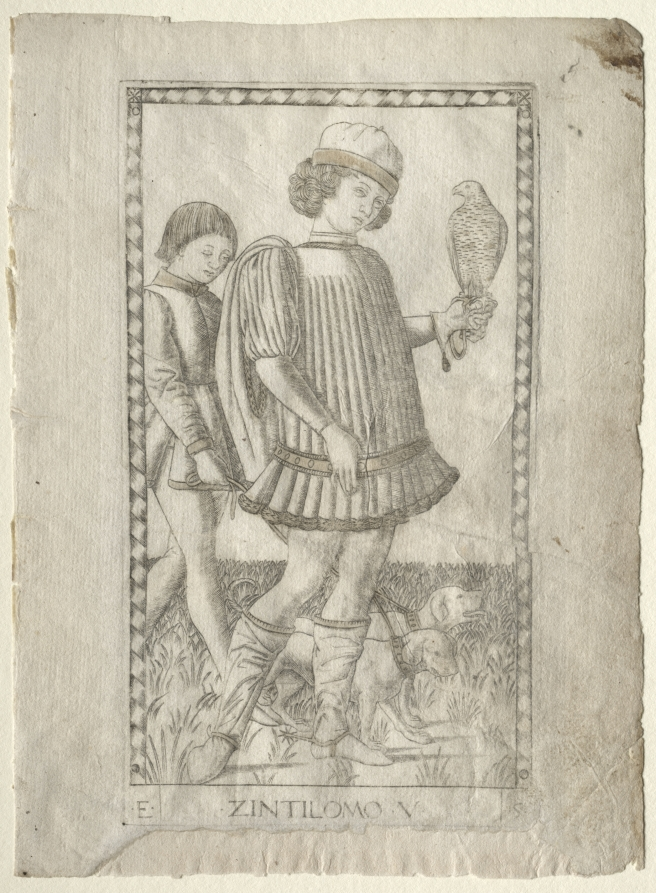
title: Gentleman (from the Tarocchi series E: Conditions of Man, #5)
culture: Italy, Ferrara, 15th century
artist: Master of the E-Series Tarocchi (Italian, active 1460s)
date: c. 1465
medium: engraving, hand-colored with gold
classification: Print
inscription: Lettered below the image of Zintilomo (The Gentleman): ·E· / ·ZINTILOMO·V· / ·5·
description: This engraving is part of the Tarocchi group marked with the letter E and named Conditions of Man. This series outlines the social and hierarchical order of ten characters (Beggar, Servant, Artisan, Merchant, Gentleman, Knight, Doge King, Emperor, and Pope), starting from the lower grade and ending with the most important one. Here, Zintilomo (The Gentleman) is shown as a full-length male figure, turned to the right. The elegantly dressed youth is holding up a falcon in his gloved left hand. A servant follows him at his back, and walks two dogs on a leash.